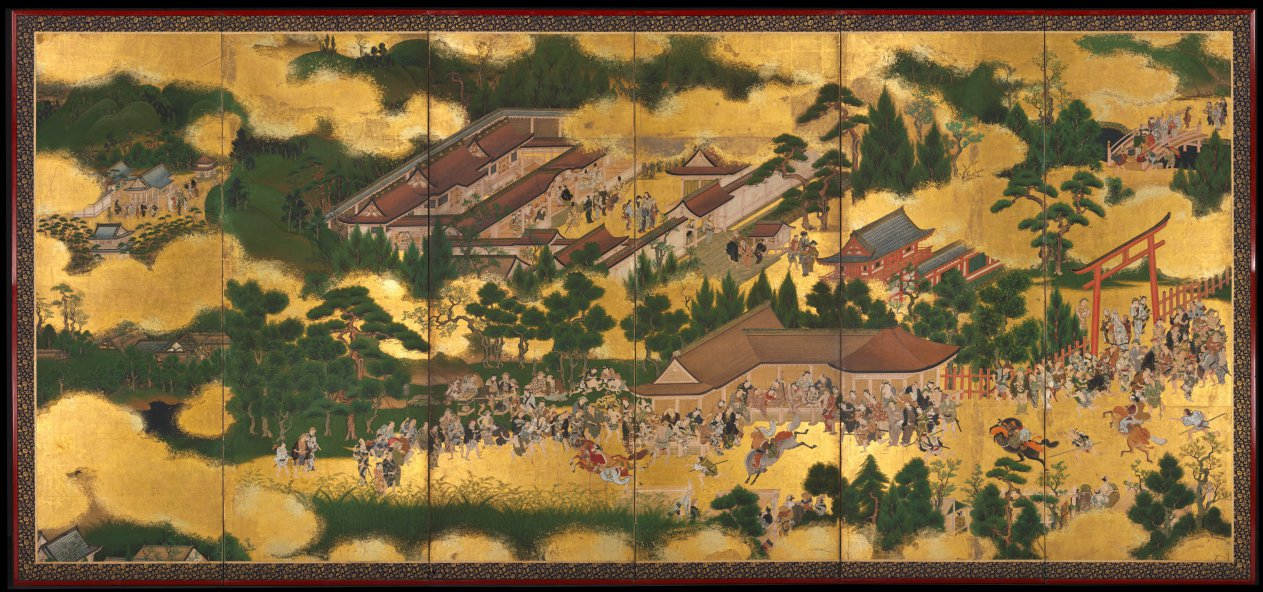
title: Horse Race at the Kamo Shrine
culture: Japan, Edo period (1615–1868)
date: early to mid-1600s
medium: One of a pair of six-panel folding screens; ink and color on gilded paper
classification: Painting